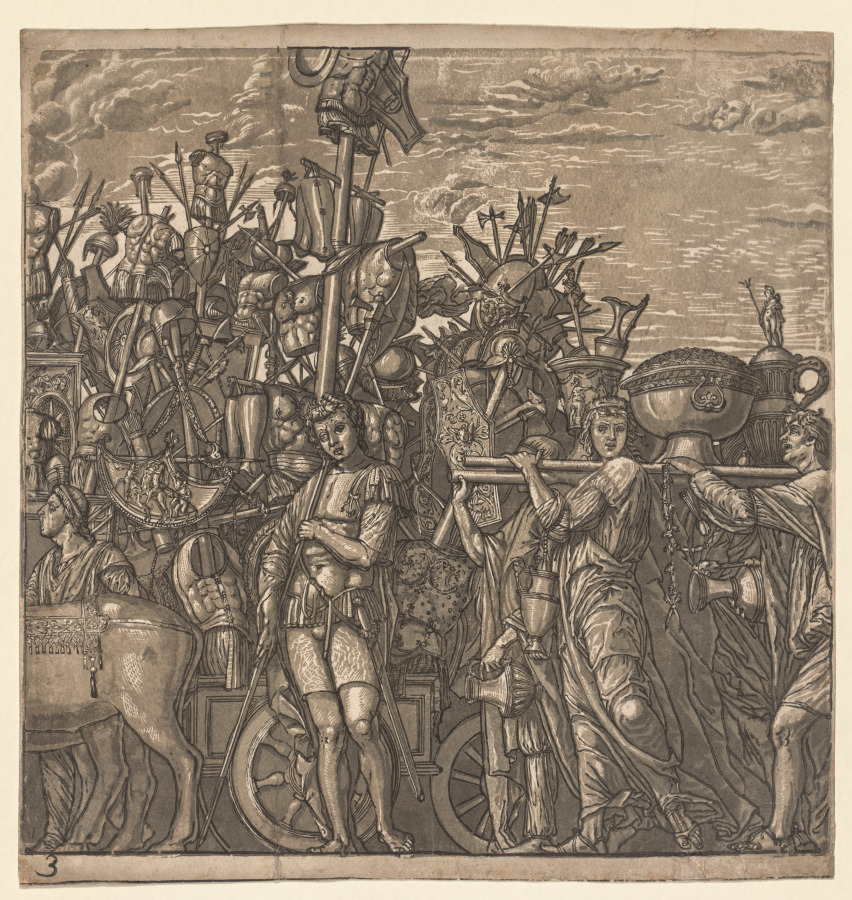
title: The Triumph of Julius Caesar: Soldiers Marching with Trophies of War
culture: Italy, 16th century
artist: Andrea Andreani (Italian, about 1558–1610)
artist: after Andrea Mantegna (Italian, about 1431–1506)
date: 1593–99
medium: chiaroscuro woodcut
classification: Print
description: Commissioned by Duke Vincenzo Gonzaga, this series of chiaroscuro woodcuts reproduces Andrea Mantegna’s Triumph of Julius Caesar, painted a century earlier. The scenes imaginatively portray the triumphal procession of the renowned Roman general and consul Julius Caesar following his successful defeat of Gaul in 52 BC. Each section of the continuous frieze shows elements typical of these parades, sanctioned by the Roman Senate and described in ancient texts. The printed suite’s frontispiece features a portrait bust of Mantegna, and the text below boasts that the famous paintings attracted many viewers. People who owned sets of these woodcuts often tacked them up to create a decorative frieze. Andreani issued the prints with a sheet of classical columns that could be cut out and placed between the scenes. Two fragments of these columns, colored orange, still flank the fourth scene.